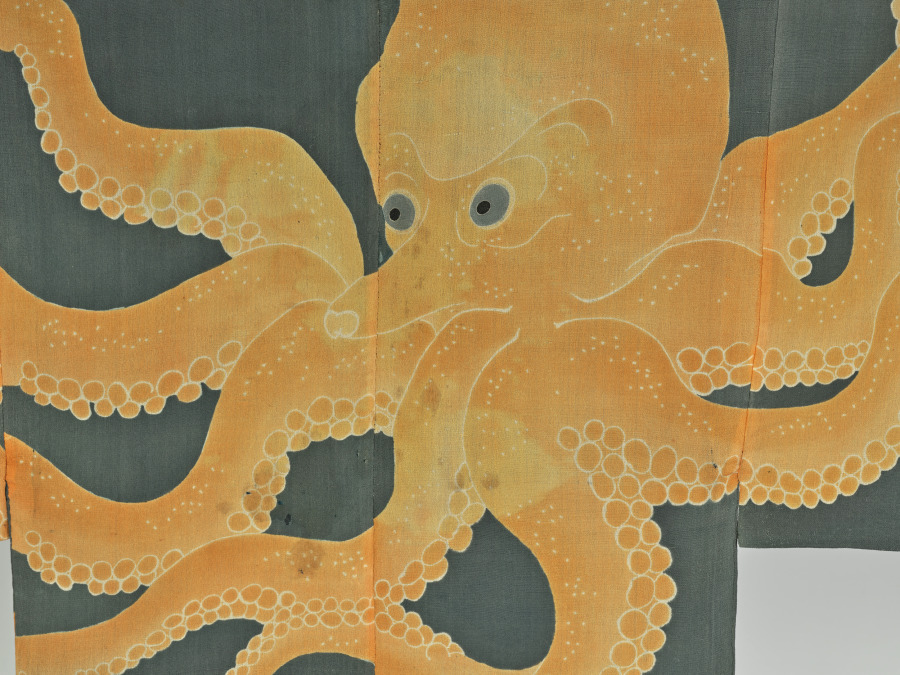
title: Jacket with Octopus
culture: Japan, Edo period (1615–1868)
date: c. 1800–1868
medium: Silk crepe (chirimen)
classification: Textile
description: With its many long arms, the octopus lends itself to a tantalizing design, with the front of this garment displaying tentacles and the back revealing the face. An octopus motif sometimes appears on costumes for the role of the Catfish Priest, a sidekick of the main villain in the Kabuki play Shibaraku (Stop a Moment!). It is also seen in genre painting during the 1600s as a logo on the uniforms of transportation staff, perhaps indicating just how much they can carry. This jacket may have recycled the idea as a fashion statement.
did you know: Crepe results from the weft thread being kept tighter than the warp thread during weaving.